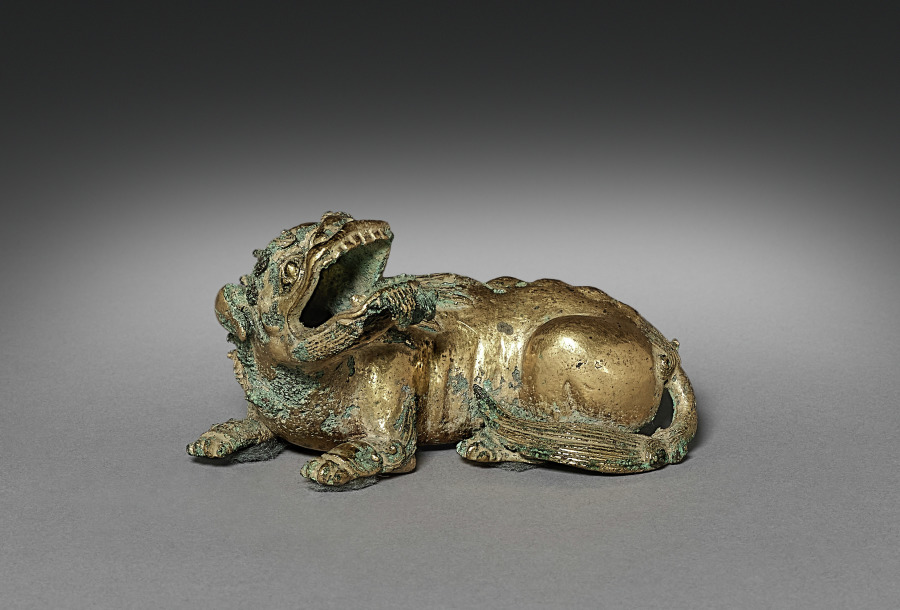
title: Dog-shaped Paperweight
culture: Korea, Unified Silla period (676-935)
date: 676–935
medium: gilt bronze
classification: Sculpture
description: This small object in the shape of a hybrid dog-lion is believed to have been used as a paperweight. Since the Three Kingdoms period (57 BC−668), mercury amalgam gilding had been widely employed to embellish metal objects as well as to make their surface resistant to acids. This technique involves mixing pure gold powder with liquid mercury to form a paste-like mixture. As heat is applied, the mercury evaporates, but an opaque layer of gold remains on the surface. This coating must be polished by first rubbing it with dried rice seedlings, then processing it in ash lye to eliminate impurities; next, the piece is washed and rinsed in a plum vinegar bath.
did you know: This is a dog and lion hybrid.